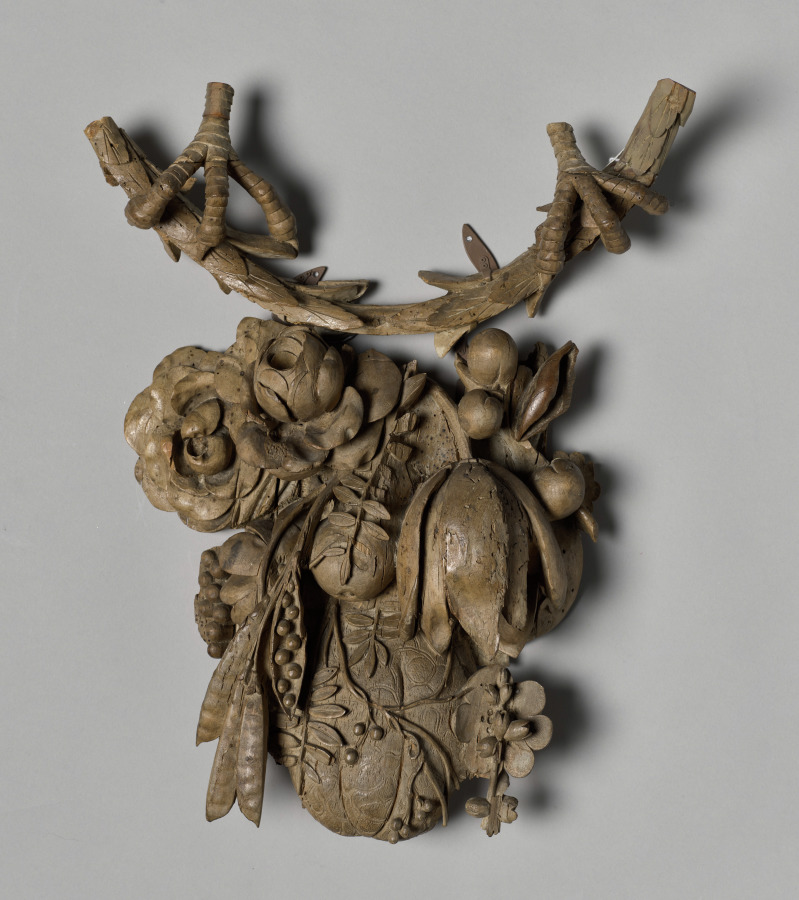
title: Carving from an Overmantel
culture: England, 17th century (Charles II)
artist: Grinling Gibbons (British, 1648–1721)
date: c. 1675–77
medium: lindenwood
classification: Sculpture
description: See cover record.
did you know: The swags of fruit and foliage featured in this wooden overmantel decoration evoke the bounty of the English countryside.